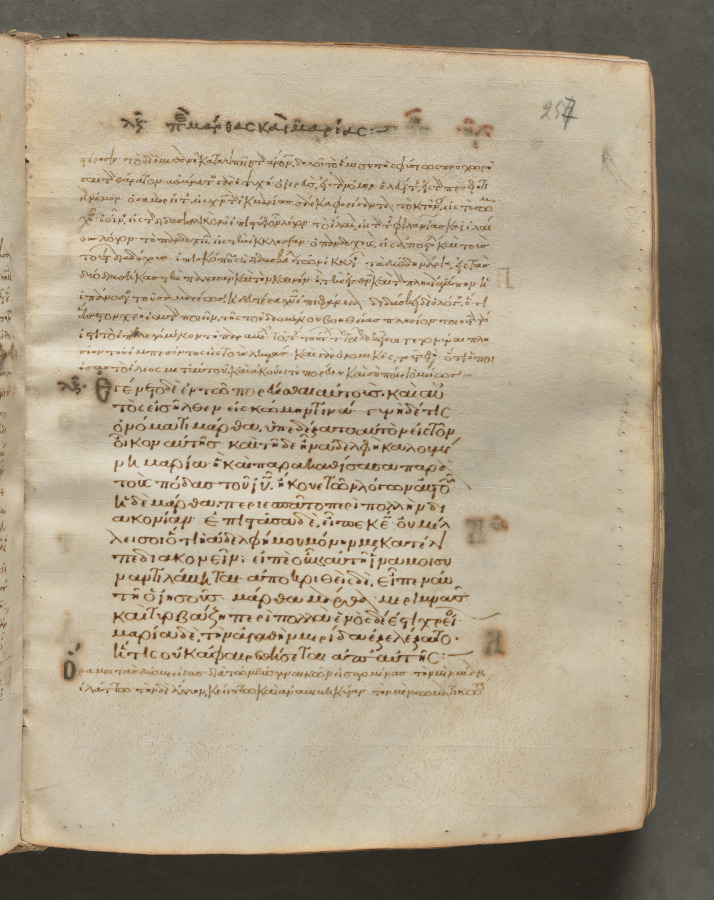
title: Text, folio 257 (recto), from a Gospel Book with Commentaries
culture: Byzantium, Constantinople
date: c. 1000–1100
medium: ink, tempera, and gold on vellum; leather binding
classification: Bound Volume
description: Each of the four gospels in this book opens on a page with brilliantly illuminated borders depicting the author of the text as well as birds—principally peacocks, symbols of the immortality of the soul—and fountains, representing the fountain of life and the salvation of the soul. This volume consists of 428 leaves with texts in Greek. Its level of sophistication suggests that it was probably written and decorated in a monastery in Constantinople.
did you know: Gospel books were carried in procession through Byzantine churches.